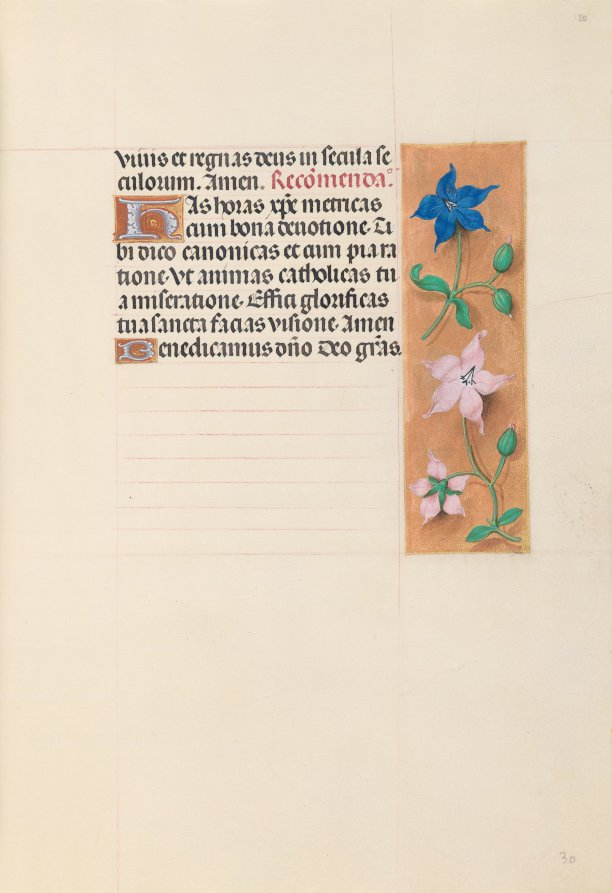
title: Hours of Queen Isabella the Catholic, Queen of Spain: Fol. 30r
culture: Flanders, Ghent and Bruges, late 15th century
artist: Master of the First Prayerbook of Maximillian (Flemish, c. 1444–1519)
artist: and Associates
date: c. 1500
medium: ink, tempera, and gold on vellum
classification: Bound Volume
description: A great lover of Flemish art, Queen Isabella treasured her many devotional books. This deluxe manuscript was created for her private devotions by highly organized and distinctly talented manuscript painters active in Ghent and Bruges. The Ghent-Bruges school represents the culmination of Flemish book painting, whose main features were the use of rich colors, illusionistic effects, a love of landscape, and a strong sense of visual narrative. Manuscripts produced by this circle of artists are renowned for their border decoration featuring a rich variety of realistically painted flowers, scrolling acanthus leaves, birds, and butterflies.